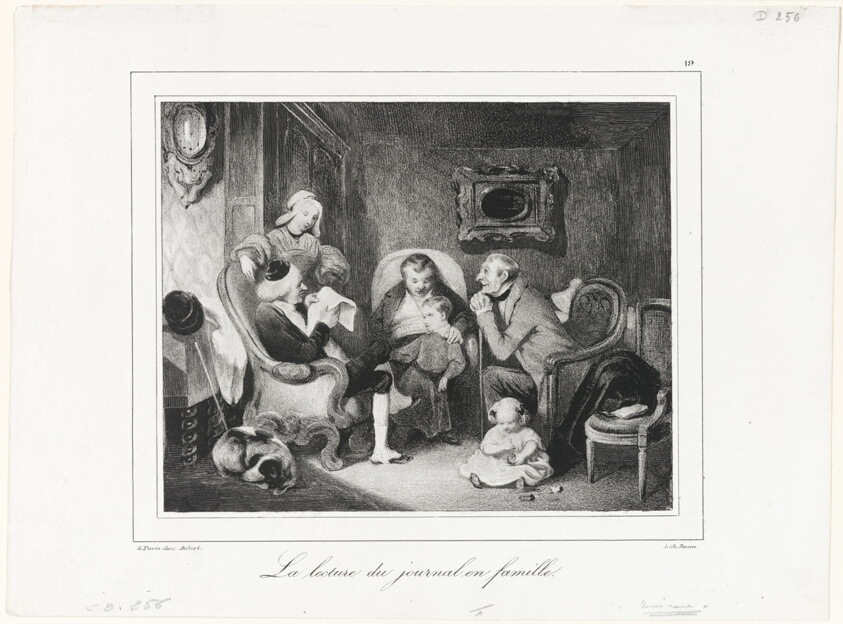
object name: Print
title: Reading the newspaper in the family circle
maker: Honoré Victorin Daumier; French, 1808-1879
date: c. 1835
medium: Lithograph in black on white wove paper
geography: France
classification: lithograph; print; prints and drawing